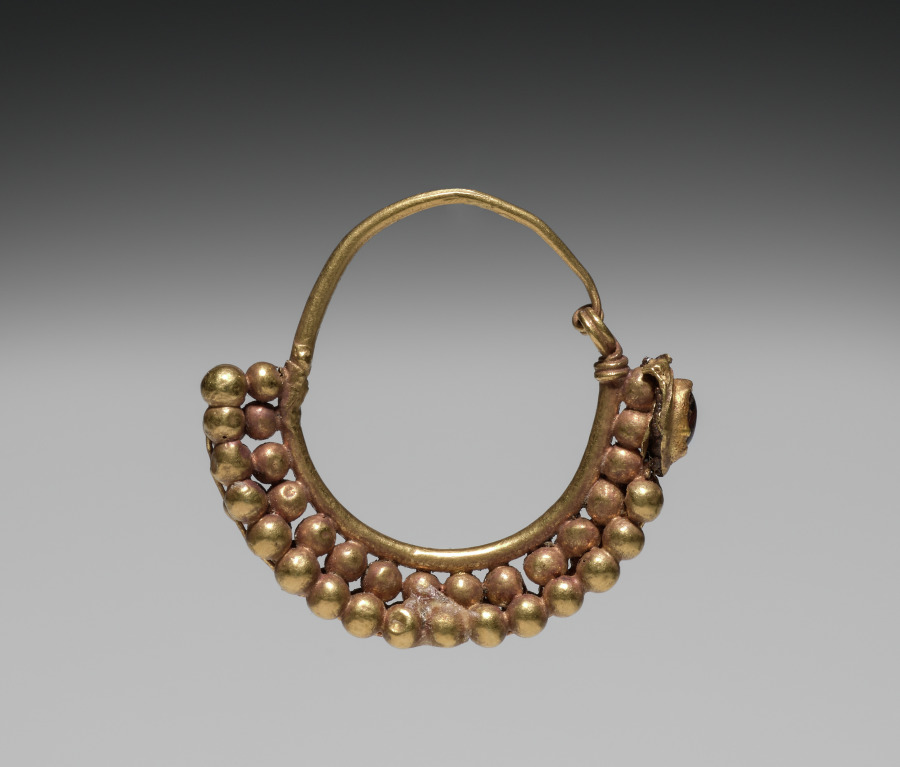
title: Earring (one of a pair)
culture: Syria, Roman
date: 100 BCE–100 CE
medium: gold and garnet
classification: Jewelry